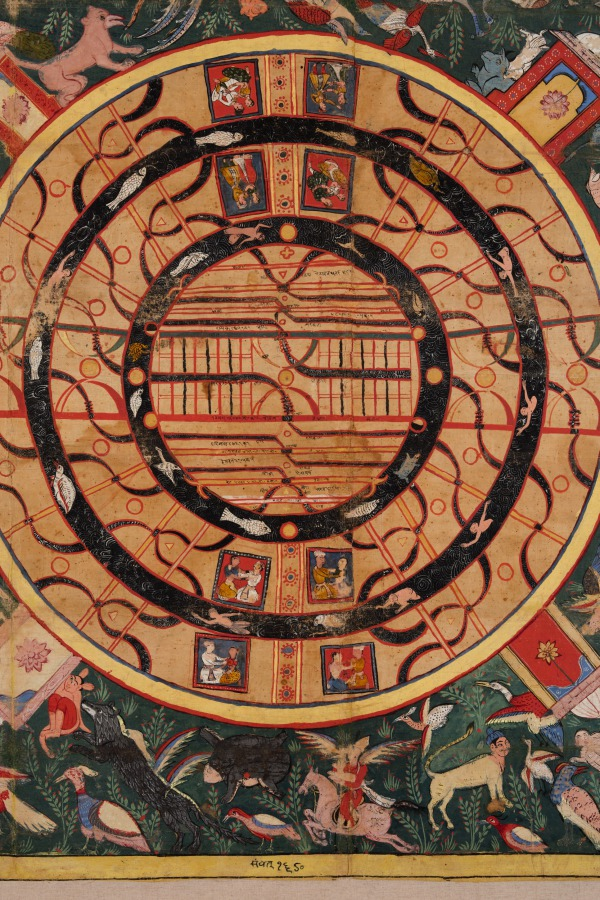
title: Diagrams of the Universe: The Two-and-a-Half Continents, the Universe in the Shape of a Person, and the Seven Levels of Hell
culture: Western India, Gujarat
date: 1613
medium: Gum tempera, ink, and gold on cloth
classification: Painting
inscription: saṃvat 1670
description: According to Jain cosmology, the universe is envisioned in the shape of a man. Above the waist are seven levels of heavens; below the waist are seven levels of hell. His midsection is the earthly realm, here shown as a round diagram with mountains and rivers, expanded at the left. The hell scenes are elaborated at the right.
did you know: The seven levels of hell depict various punishments as per Jain mythology.